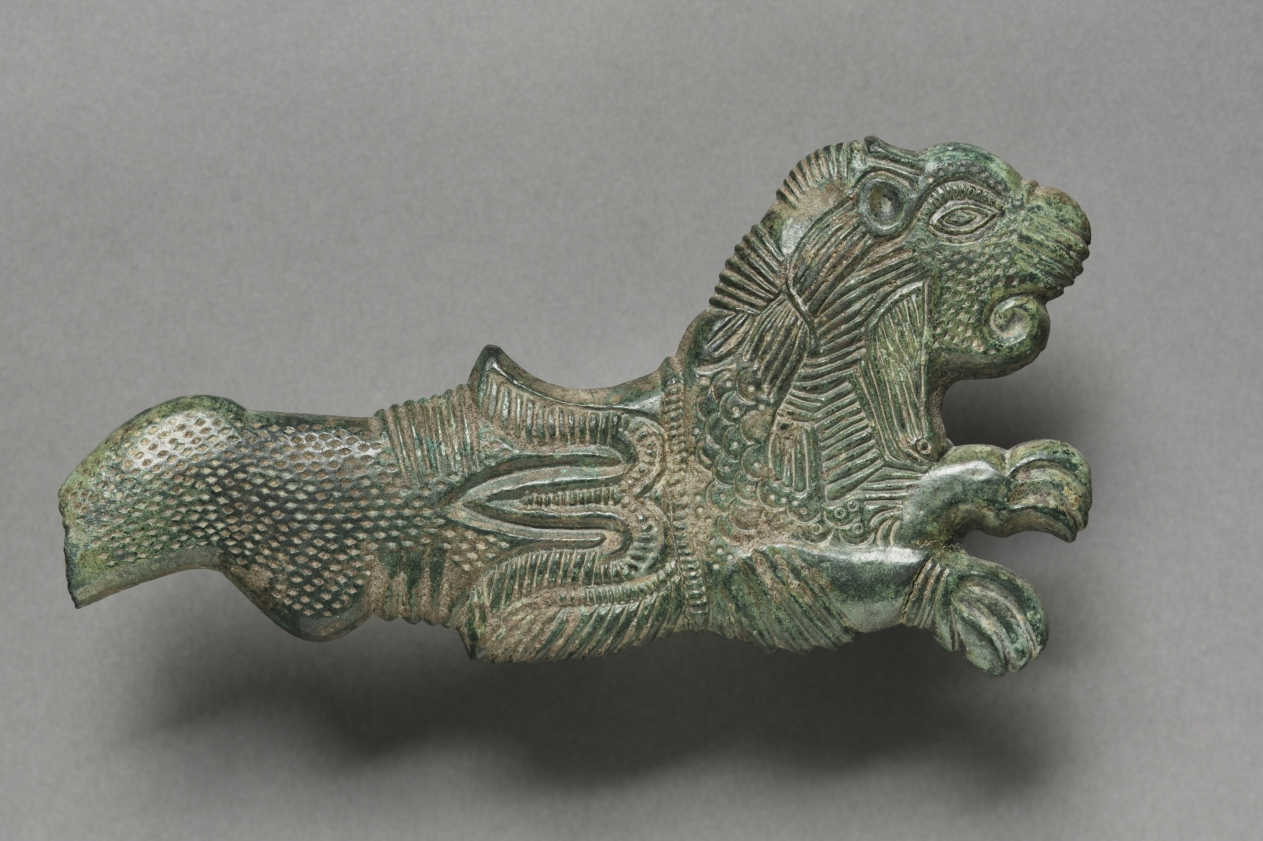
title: Hippocampus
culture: Thrace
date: 400–300 BCE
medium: bronze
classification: Sculpture